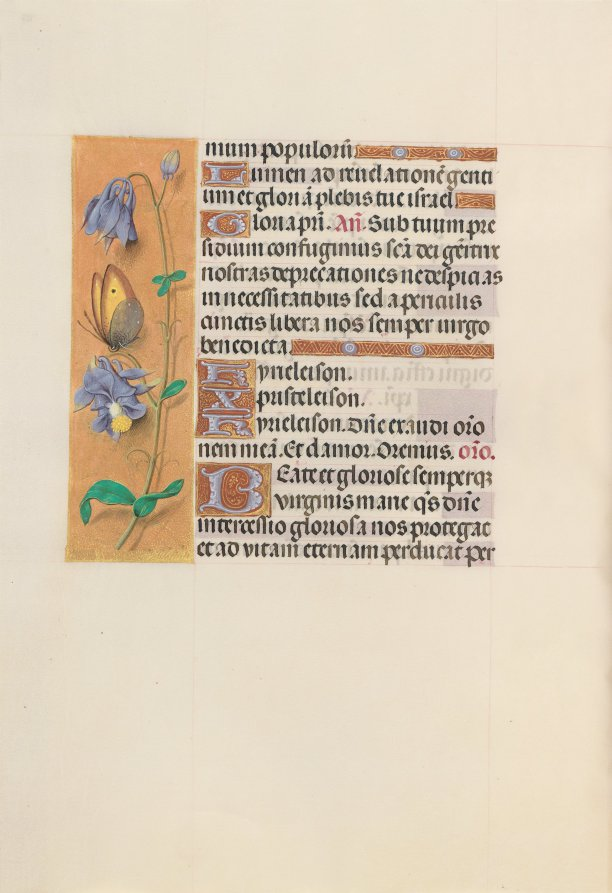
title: Hours of Queen Isabella the Catholic, Queen of Spain: Fol. 157v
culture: Flanders, Ghent and Bruges, late 15th century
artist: Master of the First Prayerbook of Maximillian (Flemish, c. 1444–1519)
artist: and Associates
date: c. 1500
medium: ink, tempera, and gold on vellum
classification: Bound Volume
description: This manuscript was illuminated by a circle of at least five highly organized manuscript painters active in the Flemish cities of Ghent and Bruges. The principal illuminator was Alexander Bening, who painted the majority of the book's miniatures. Manuscripts produced by this circle of artists are renowned for the decoration of their borders, which typically feature a rich variety of realistically-painted flowers, birds, and butterflies. This prayer book, called a book of hours, was intended not for a cleric, but for the private devotions of a lay person-in this case, Isabella the Catholic, Queen of Spain (1451-1504). Isabella's coat of arms embellishes the book's frontispiece. It is unlikely that the book was commissioned by the Queen herself; rather, she probably received it as a diplomatic gift from someone courting her patronage, perhaps Cardinal Francisco Jimenez de Cisneros. A Franciscan friar, Jimenez was dependent upon Isabella for his advancement, first to the post of Queen's confessor in 1492, and then to Archbishop of Toledo in 1495.